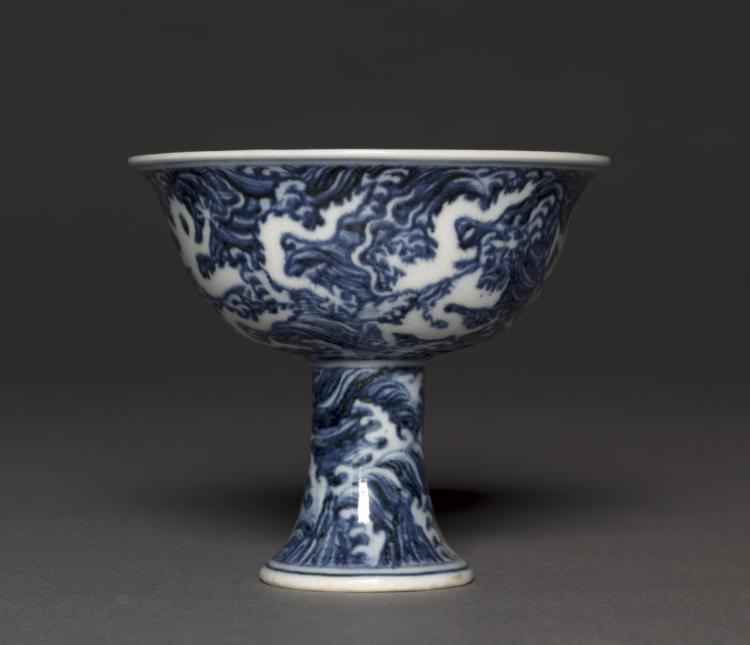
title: Stem Cup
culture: China, Jiangxi province, Jingdezhen, Ming dynasty (1368-1644), Xuande mark and period (1426-1435)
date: 1426–35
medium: porcelain with reversed underglaze blue and incised decoration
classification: Ceramic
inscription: 大明宣德年製